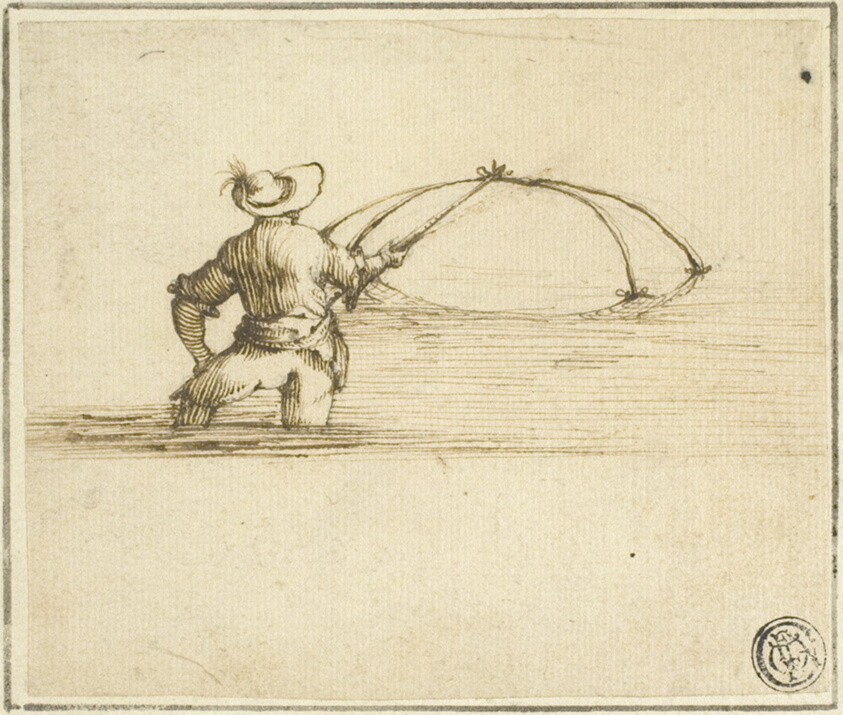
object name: Drawing and Watercolor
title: Fisherman with Net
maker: Style of Stefano della Bella; Italian, 1610-1664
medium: Pen and brown ink, over graphite, on ivory laid paper, laid down on cream laid paper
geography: Italy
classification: pen and ink drawings; drawings (visual works); prints and drawing